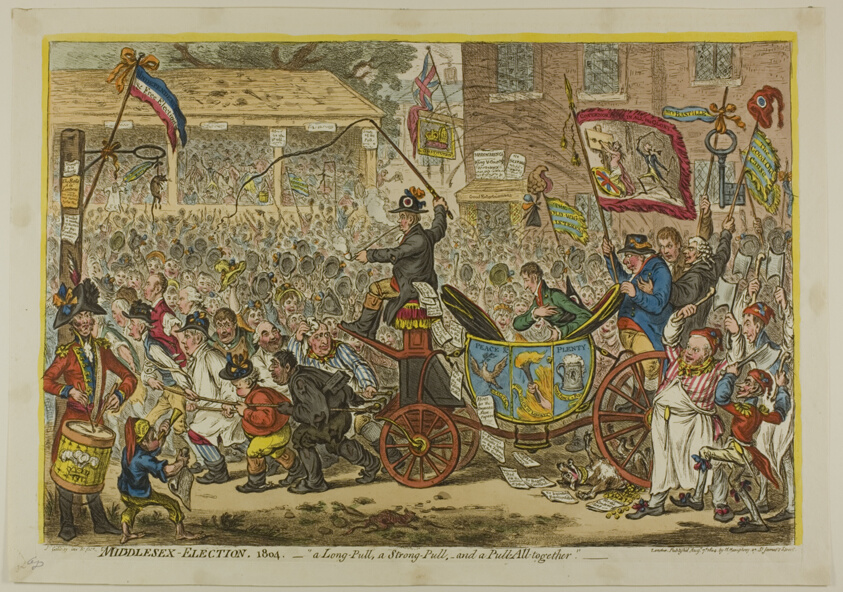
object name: Print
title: Middlesex Election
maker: James Gillray (English, 1756-1815); published by Hannah Humphrey (English, c. 1745-1818)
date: published August 7, 1804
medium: Hand-colored etching on paper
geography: England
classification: etching; print; prints and drawing